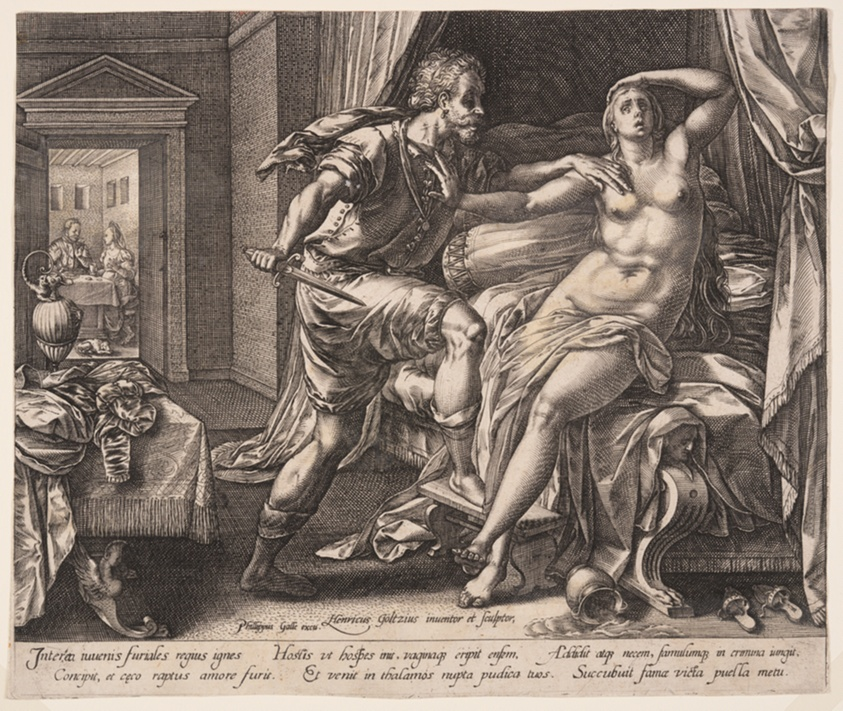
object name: Print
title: Tarquinius and Lucretia, from The Story of Lucretia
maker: Hendrick Goltzius (Dutch, 1558–1617)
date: 1578–79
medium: Engraving on laid paper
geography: Netherlands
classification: print; engraving; paper; prints and drawing